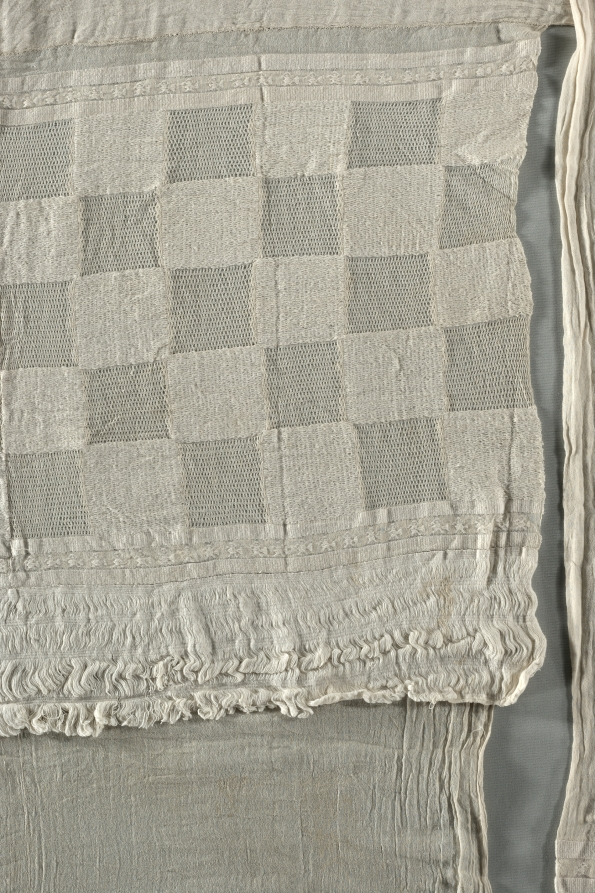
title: Loincloth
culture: Peru, North Coast, Chimú style, 1200–1460s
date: 1425–1500 (radiocarbon date, 92.3% probability)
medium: cotton; plain weave, brocaded and complex alternating gauze with 5 shots of plain weave between gauze shots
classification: Garment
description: Loincloths were basic men’s wear in ancient Peru. But the extraordinary size of some examples—this one is about eight feet long, unfolded—makes it difficult to know how they were worn, except that they were tied around the waist with the decorated panels hanging at the front and back of the body. The appearance may have been that of a billowing skirt.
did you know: This loincloth is huge!